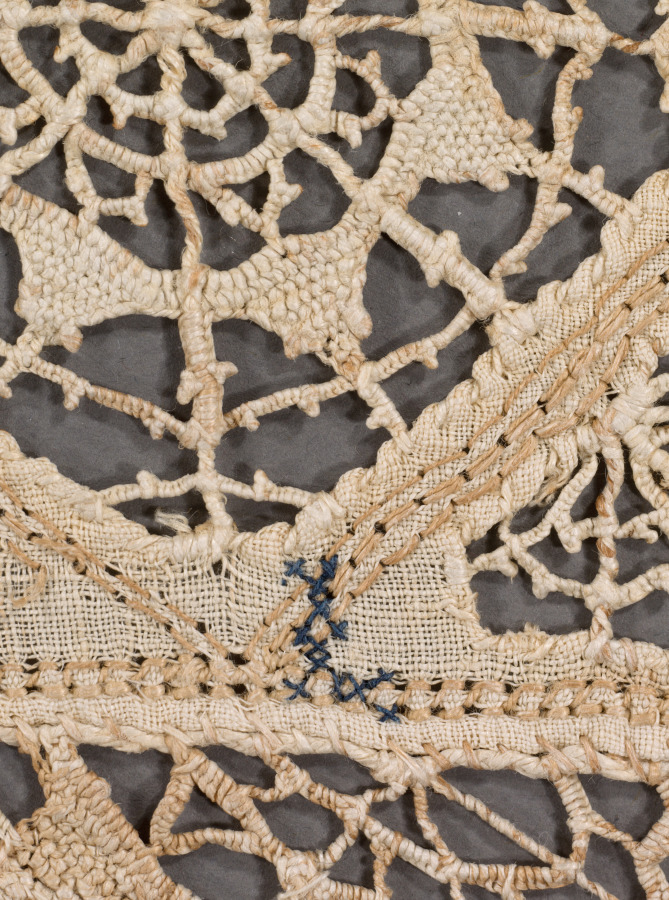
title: Lace Cloth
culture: Italy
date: 1560–1600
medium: Linen; needle lace (cutwork and reticella)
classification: Lace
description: Consisting of more than 80 squares of cutwork (a cut and embellished linen ground) and rectangles of reticella (needle lace), this luxurious cover could have been made by a single person or several people who divided the work. Close looking reveals that the cloth is made with threads of two very slightly different colors: bleached and unbleached linen. Together the sections resemble snowflakes, which are of similar shape and size but vary subtly from one another. The perplexing dark stitches in the upper left corner do not repair damage, and might be the maker’s signature.